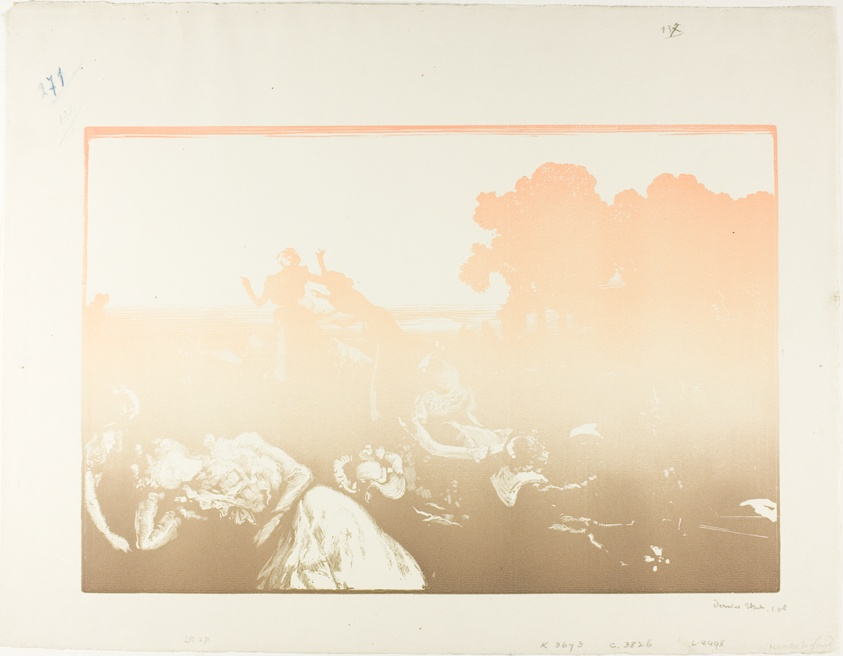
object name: Print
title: Modern Bucolic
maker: Louis Auguste Lepère (French, 1849-1918); commissioned by and final state published by Graphischen Künste (Austrian, active 19th-20th centuries)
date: 1901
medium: Woodcut in olive-brown, peach and fawn from one block on cream laid paper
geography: France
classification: woodcut; print; prints and drawing